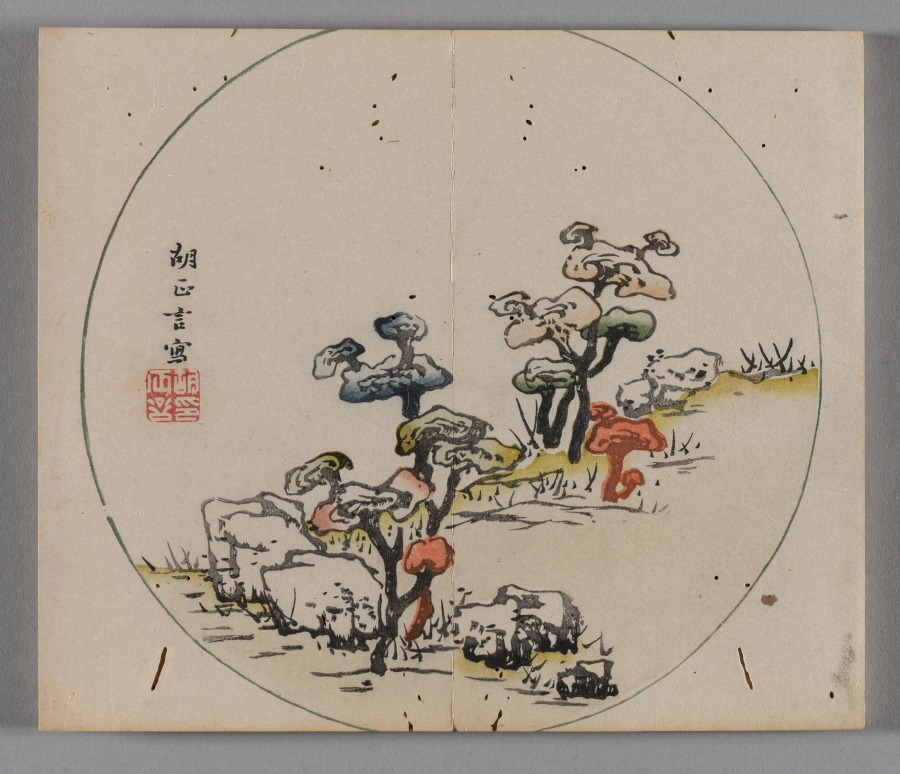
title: Ten Bamboo Studio Collection of Calligraphy and Painting: Round Fans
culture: China, Qing dynasty (1644-1911)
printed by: Hu Zhengyan (Chinese, c. 1584–1674)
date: 1633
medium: Woodblock-printed book; ink and colors on paper; first edition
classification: Print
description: Color printing reached a level of perfection in the early 1600s, as seen in this Ten Bamboo Studio Collection of Calligraphy and Painting and the Mustard Seed Garden Manual of Painting (printed 1679 and 1701). The painterly quality, precision in registering (aligning) the woodblocks, and harmonious colors made them the most successful color print editions in Chinese history. Both editions were printed and compiled in Nanjing, spread nationwide, and had a great impact on the arts in Japan and Korea.